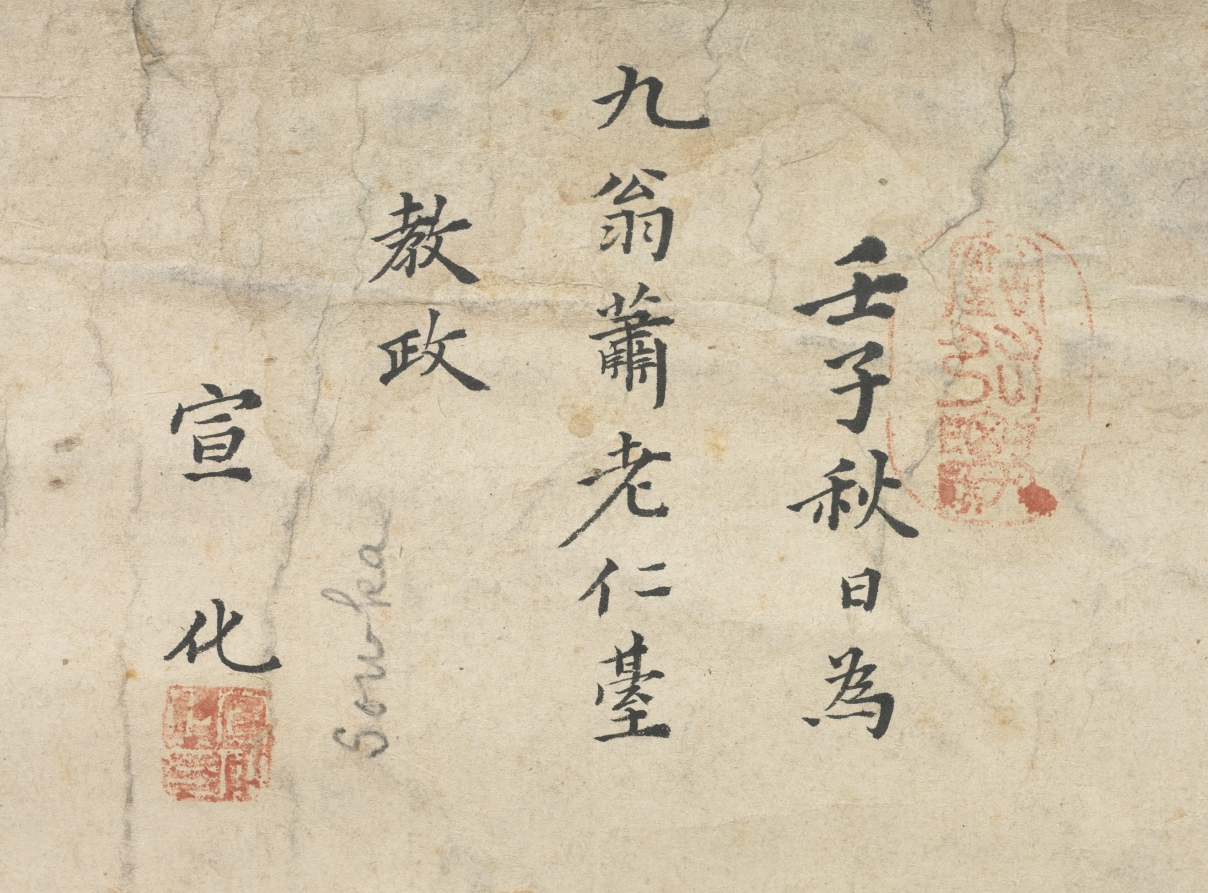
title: Wild Geese and Reeds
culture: Korea, Joseon dynasty (1392–1910)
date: 1392–1910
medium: Unmounted hanging scroll; ink on paper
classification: Painting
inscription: Artist's inscription with two seals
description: In this hanging scroll, wild geese are portrayed engaging in different activities: descending to a marsh, gathering in flocks, and grazing on plants. In Korean paintings, images of geese and reeds serve as the symbol of peaceful senior life; a homophone of geese and reeds means aging peacefully.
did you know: Paintings that depict a peaceful image of migratory white-fronted geese descending to a river bank where tall reeds gently bend in the evening breeze were widely favored as birthday gifts, especially to elders: a homophone of the title Geese and Reeds means Aging Peacefully.